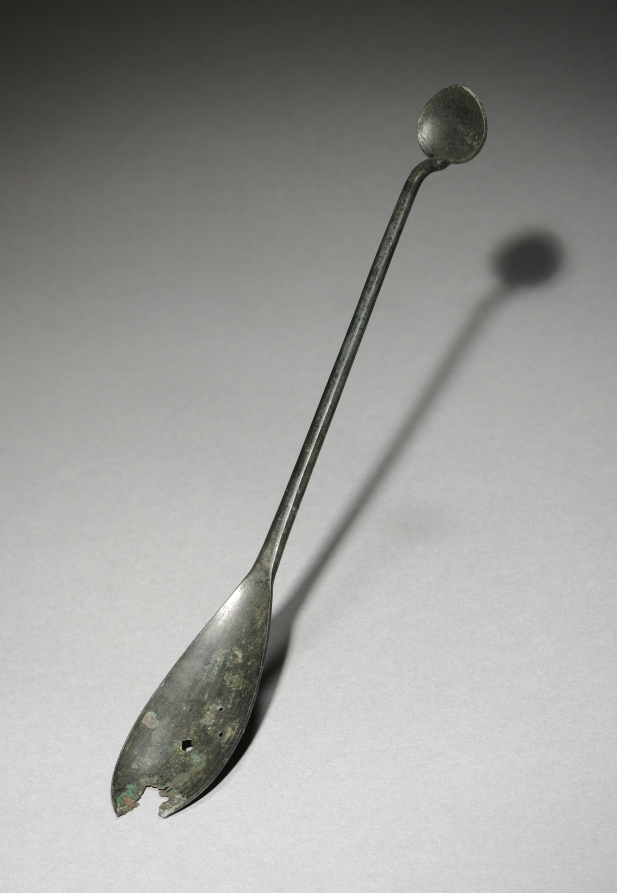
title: Spoon with Dual Heads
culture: Korea, Goryeo dynasty (918–1392)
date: 918–1392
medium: bronze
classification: Metalwork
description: Many of Goryeo period spoons like this one feature a curved handle that splits into a jagged fishtail design. This fishtail design is not unique to Korea; it was also widely used in the area under the rule of two non-Han Chinese states: Liao (907–1125) and Jin (1115–1234). These seemingly ordinary objects testify to exciting material interactions between the Goryeo dynasty and non-Han Chinese northern states, which were often omitted from the official records.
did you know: Bronze spoons are the most common burial item. Scholars have proposed that toward the end of the 14th century, Koreans enjoyed meat-based soups more than any other dishes, explaining why spoons became common household items as well as burial goods.